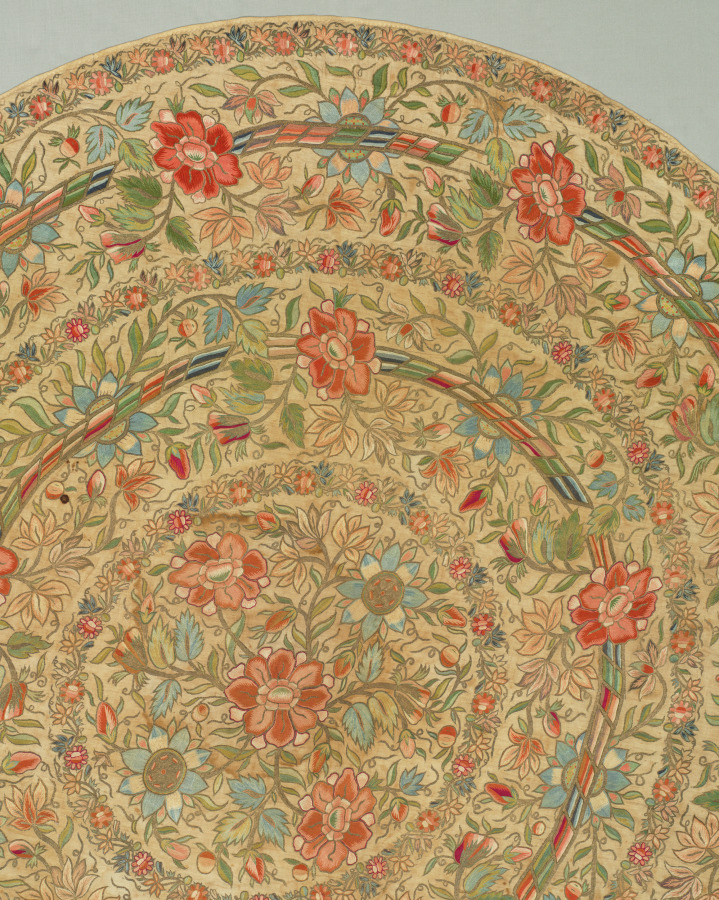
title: Embroidered tray cover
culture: Turkey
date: 1800s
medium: plain weave: linen; embroidery, chain stitch: silk and gilt-metal thread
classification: Embroidery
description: Elaborately embellished round embroideries often covered the metal trays that accompanied traditionally gracious Turkish hospitality and cuisine. Here, exuberant floral displays and garlands bearing large blossoms with shaded petals enrich the circular designs that feature extravagant gilt-metal thread and many lush colors of silk thread. The embroidered stitches almost conceal the linen ground in a spectacular tour-de-force.